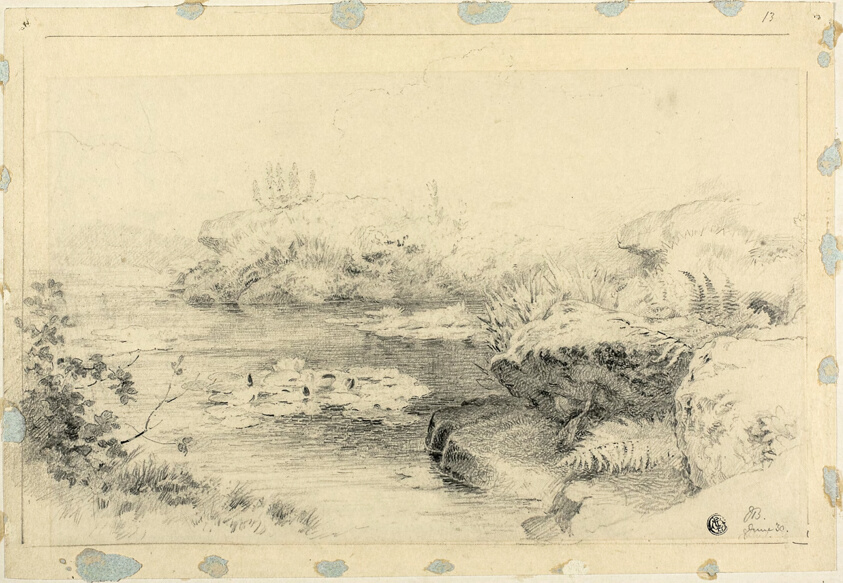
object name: Drawing and Watercolor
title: Pond with Water Lilies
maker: Jabez Bligh (English, 1863-1894)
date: 1883/89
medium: Graphite on cream wove paper, laid down on board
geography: England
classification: graphite; drawings (visual works); prints and drawing